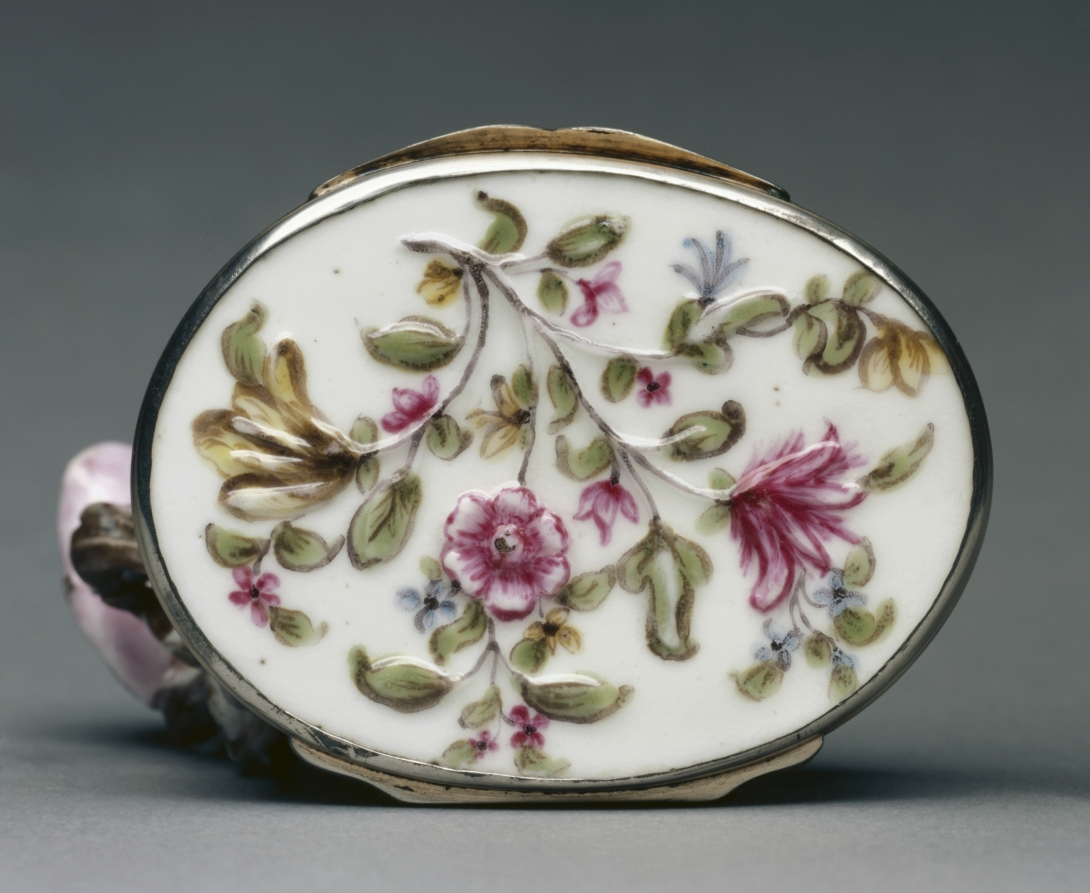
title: Box with Reclining Huntress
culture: France, Mennecy, 18th century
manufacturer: Mennecy Factory (French)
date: c. 1753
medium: soft-paste porcelain mounted in silver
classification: Ceramic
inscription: porcelain unmarked